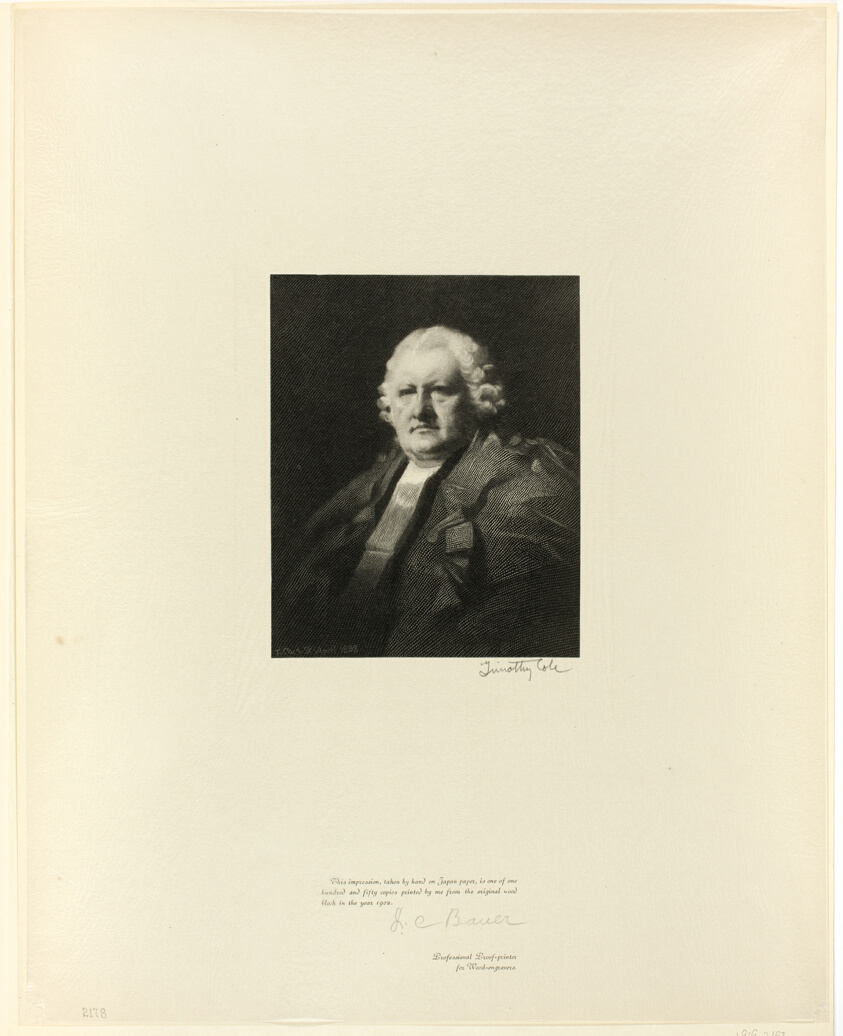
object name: Print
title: Portrait of Lord Newton, from Old English Masters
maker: Timothy Cole (American, born England, 1852-1931); after Sir Henry Raeburn (Scottish, 1756-1823)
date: 1898, printed 1902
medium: Wood engraving on chine paper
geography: United States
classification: wood engraving; print; prints and drawing